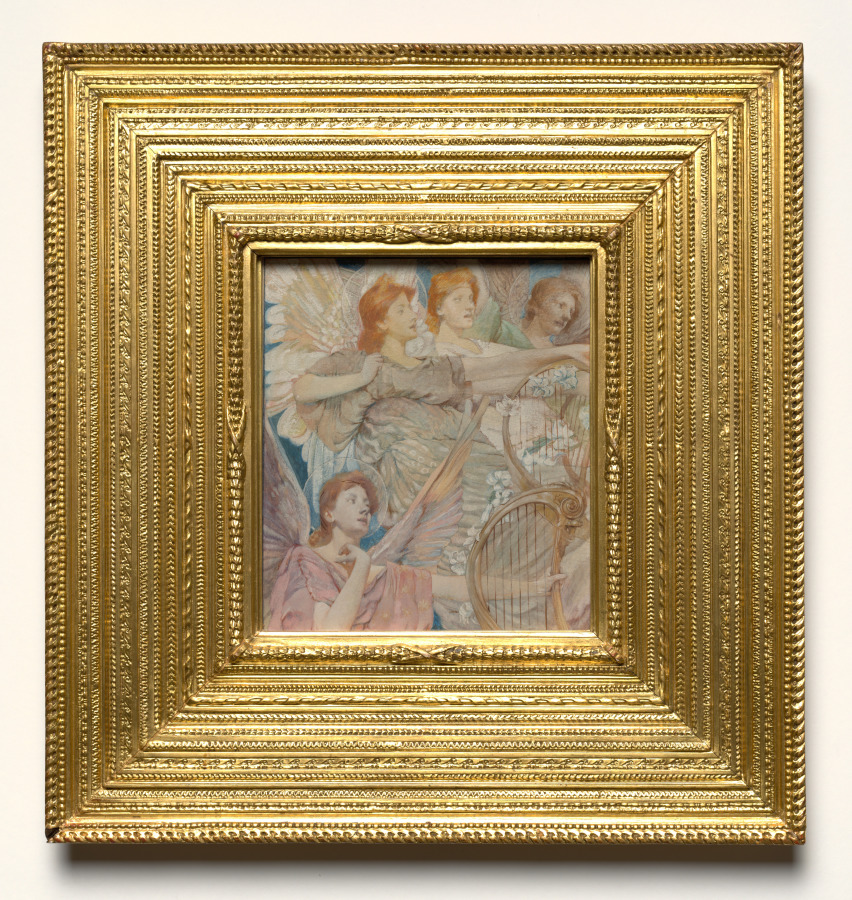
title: Gloria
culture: America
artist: Thomas Wilmer Dewing (American, 1851–1938)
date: 1884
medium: gouache over graphite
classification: Drawing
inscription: signed, upper left, in graphite: T W Dewing / 1884; by artist, across bottom, in watercolor: gloria; verso, center, in graphite: [sTC?] [underlined]; 15 x 162 [underlined] / 165; center left, in graphite: 125 [underlined]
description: Dewing’s small, densely packed composition of four singing angels alludes to depictions of angels playing musical instruments found in 14th-century medieval manuscripts. Angels were traditionally shown playing stringed instruments, whose delicate tones were thought to lift the mind to spiritual matters. The harp, as depicted here, was the instrument most closely associated with heavenly music. With the continuous circling of halos and harps, Dewing suggested a hypnotic, celestial melody.